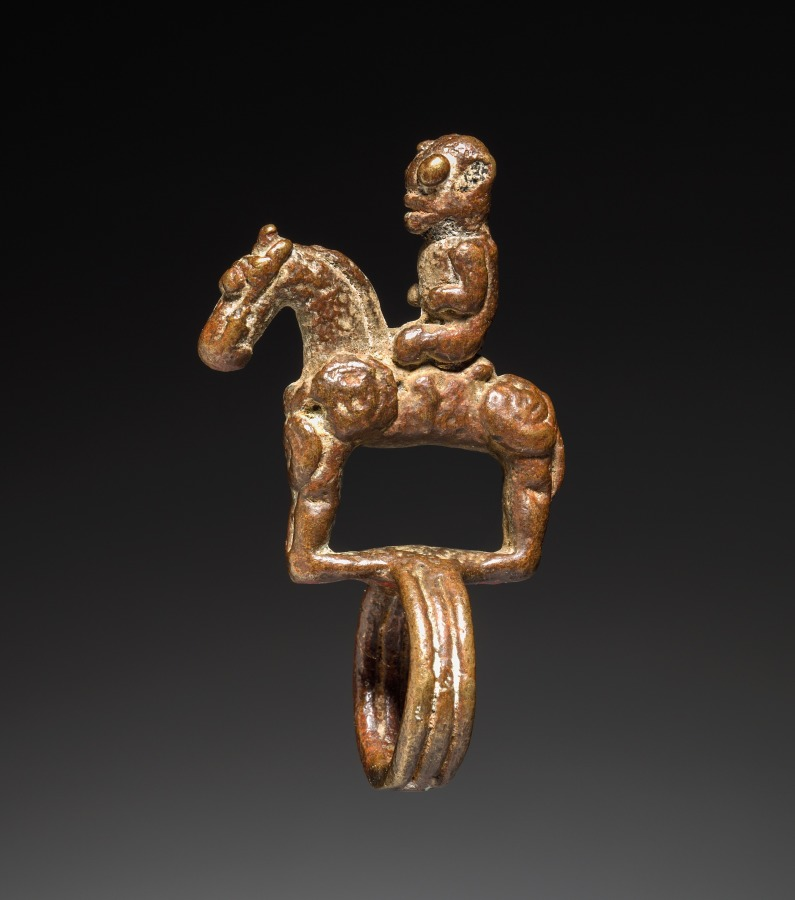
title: Ring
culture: Africa, West Africa, Mali, Dogon-style maker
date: before 1975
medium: Copper alloy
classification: Jewelry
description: This ring may have belonged to a Hogon, the highest religious dignitary in a Dogon community, who wore it among the many insignia of his status. The horse is a kind of moving throne, indicating the physical and symbolic power of its rider, who is placed physically in space above others. While it is difficult to make out details on the rider, the horse is well-equipped with a bridle and saddle. The circular shapes at the front and back of the animal's sides may represent shields. To make this ring, a smith first modeled it in wax. The wax was covered in clay and melted out when baked, leaving behind a mold to pour liquid metal into.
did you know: Horses were known in the region of present-day Mali from early eras, recorded in the accounts of the Arab traveler Ibn Battuta in 1352, and in the Malian epic Soundiata, where riders on horseback masterfully used lances and swords